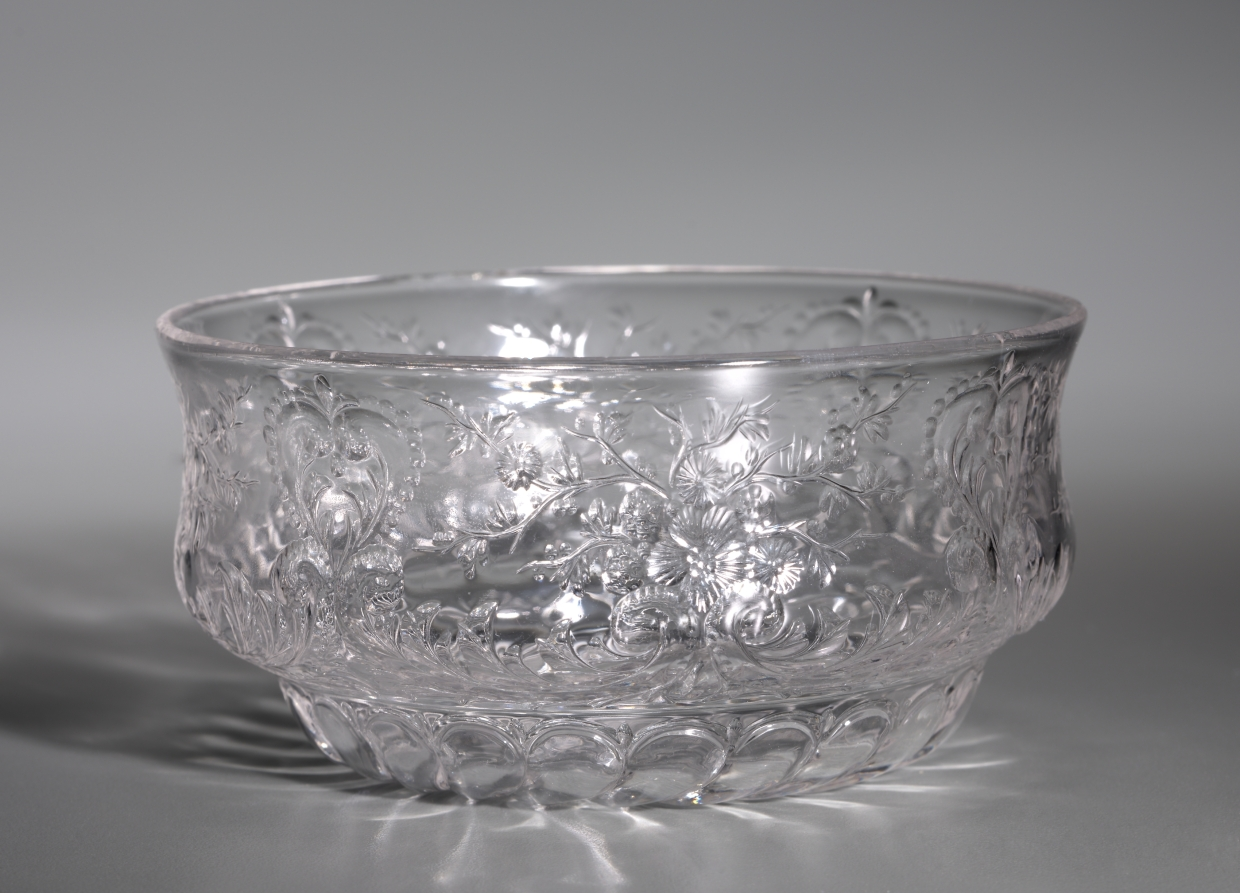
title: Bowl from a Place Setting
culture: probably America, late 19th-early 20th century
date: c. 1890–1920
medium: glass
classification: Glass